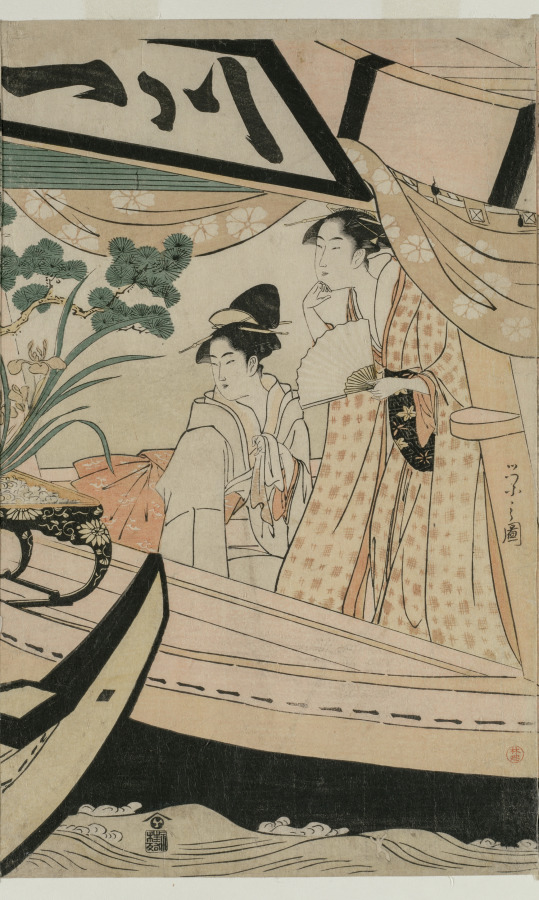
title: Party on the Pleasure Boat Kawaichimaru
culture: Japan, Edo period (1615–1868)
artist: Chōbunsai Eishi (Japanese, 1756–1829)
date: c. 1796–97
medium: One of a pentaptych of color woodblock prints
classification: Print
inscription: Signature: Eishi zu Seal: kiwame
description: A pleasure boat named Kawaichimaru is filled with entertainers in this expansive scene. At the vessel’s right end, a young dancer waits as her costume’s hat is arranged. In the middle, a trio of musicians performs, two on drums and another on shamisen, a three-stringed instrument. Listening to them is an elegant woman smoking her pipe. At the left end, three women, one on a neighboring boat, enjoy a spectacular floral arrangement of pine, lily, and iris on a lacquer stand.